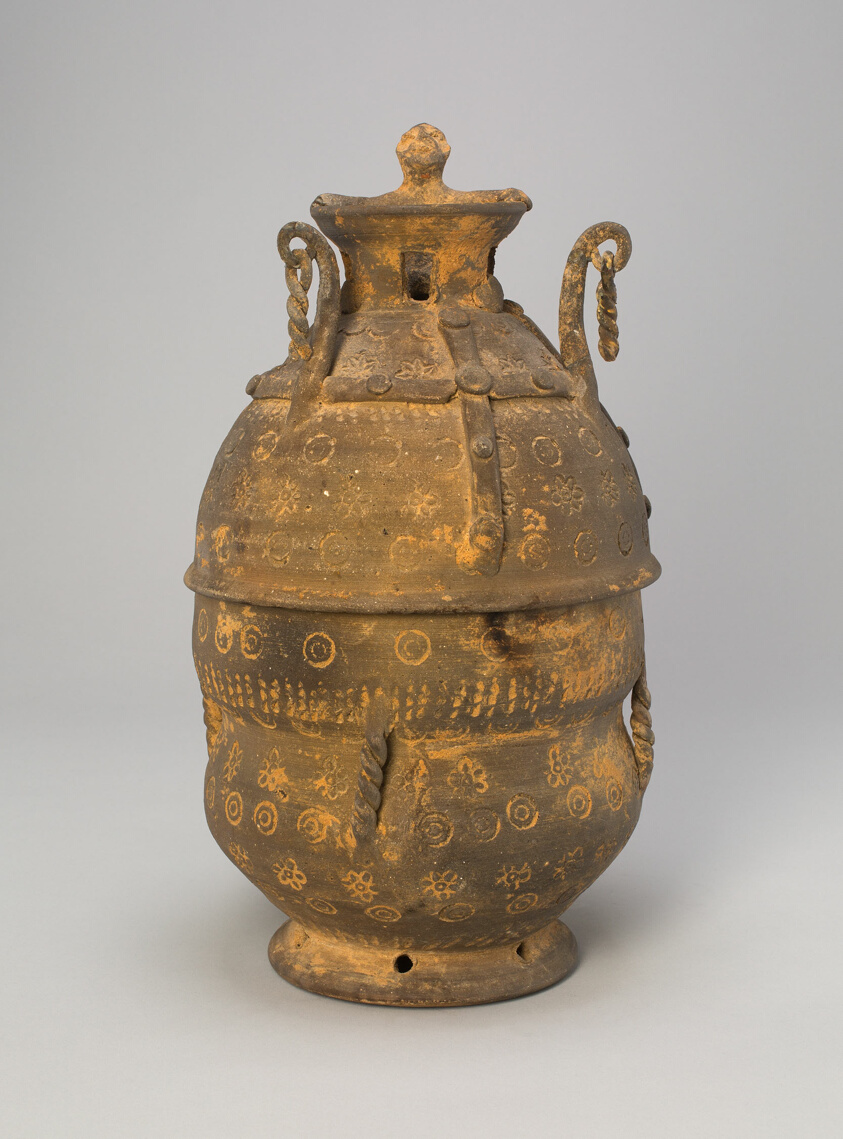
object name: Vessel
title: Reliquary Jar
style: Korean (culture or style)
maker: Korea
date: Three Kingdoms period (57 B.C.–A.D. 676), early 7th century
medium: Stoneware with impressed decoration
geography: Korea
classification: reliquary; container; earthenware; asian art; ceramics; vessel